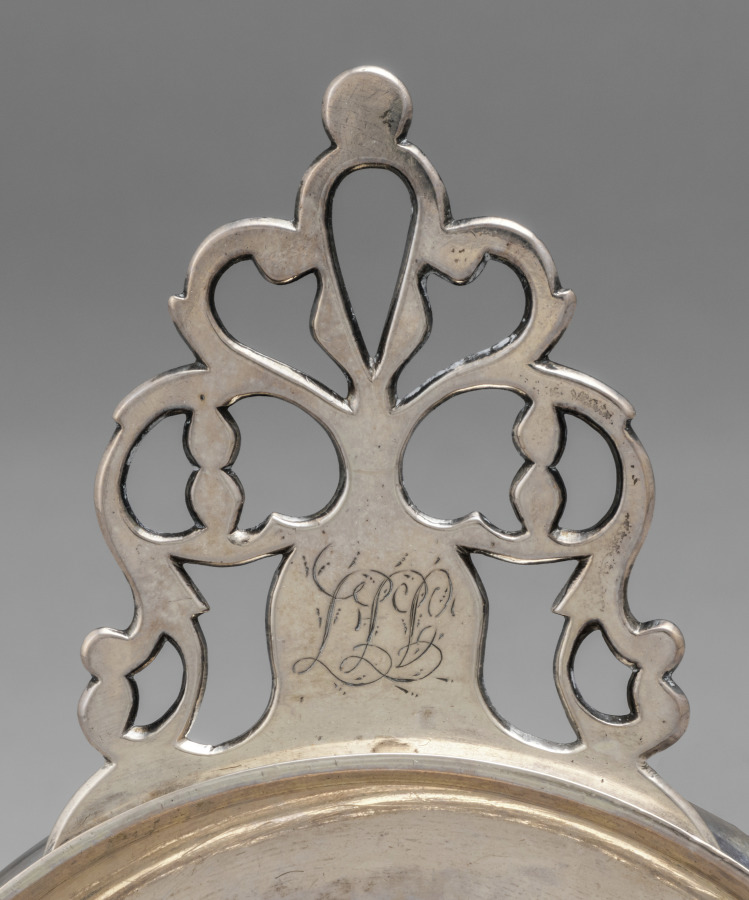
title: Porringer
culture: America, Massachusetts, Newburyport, late 18th-early 19th Century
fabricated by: William IV Moulton (American, 1772–1861)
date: c. 1800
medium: silver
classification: Silver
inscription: engraved "JFS" (or JFT) in bright-cut script on top of handle.